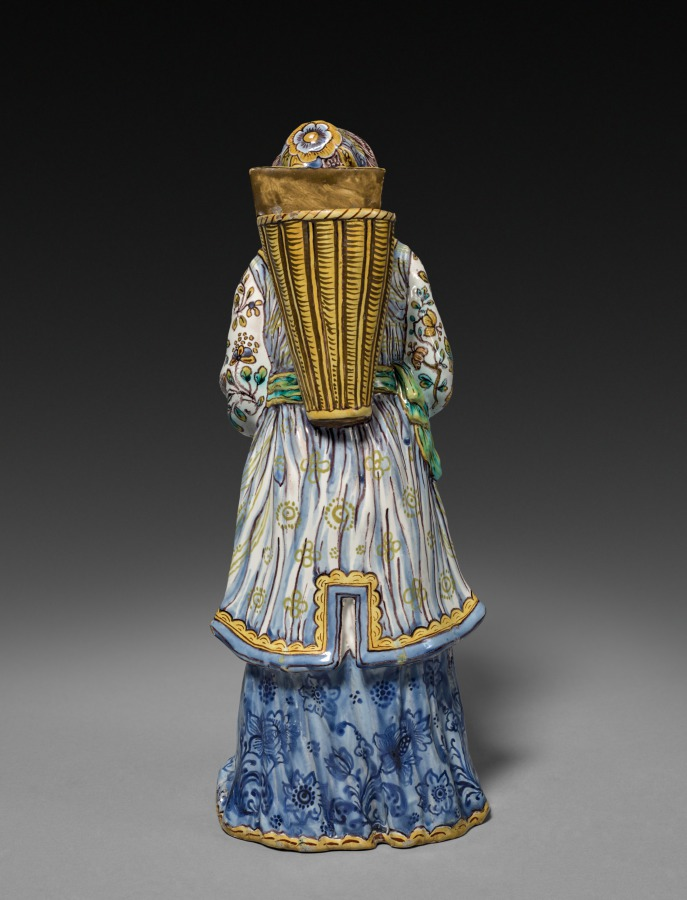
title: Figure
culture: France, Strasbourg, 18th century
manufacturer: Strasbourg Factory (France)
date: 1745–50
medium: faience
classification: Ceramic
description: For several decades in the middle of the 18th century the Hannong family were proprietors of one of the best and most influential French faience factories at Strasbourg. Here German and French ceramic styles and techniques met and were fused. These figures were copied from a pair executed in Chantilly porcelain which in turn relied on a Meissen prototype.